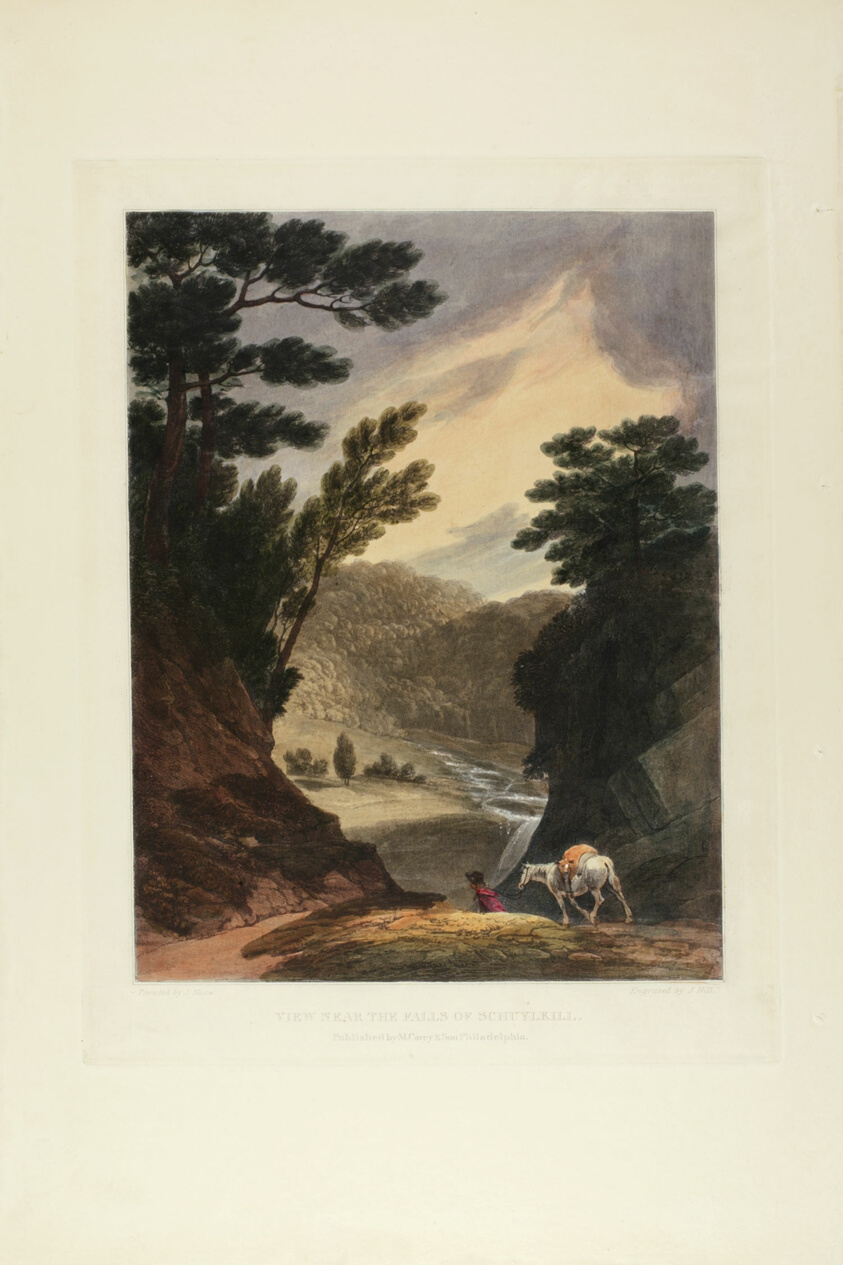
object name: Print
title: View Near the Schuylkill Falls, Pennsylvania, plate five of the first number of Picturesque Views of American Scenery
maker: John Hill (American, 1770-1850); after Joshua Shaw (American, born England, c. 1777-1860); published by Matthew Carey & Son (American, active 1795-1821)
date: 1819/21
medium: Aquatint with etching and hand-coloring on cream wove paper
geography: United States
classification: aquatint; prints and drawing; print; portfolio